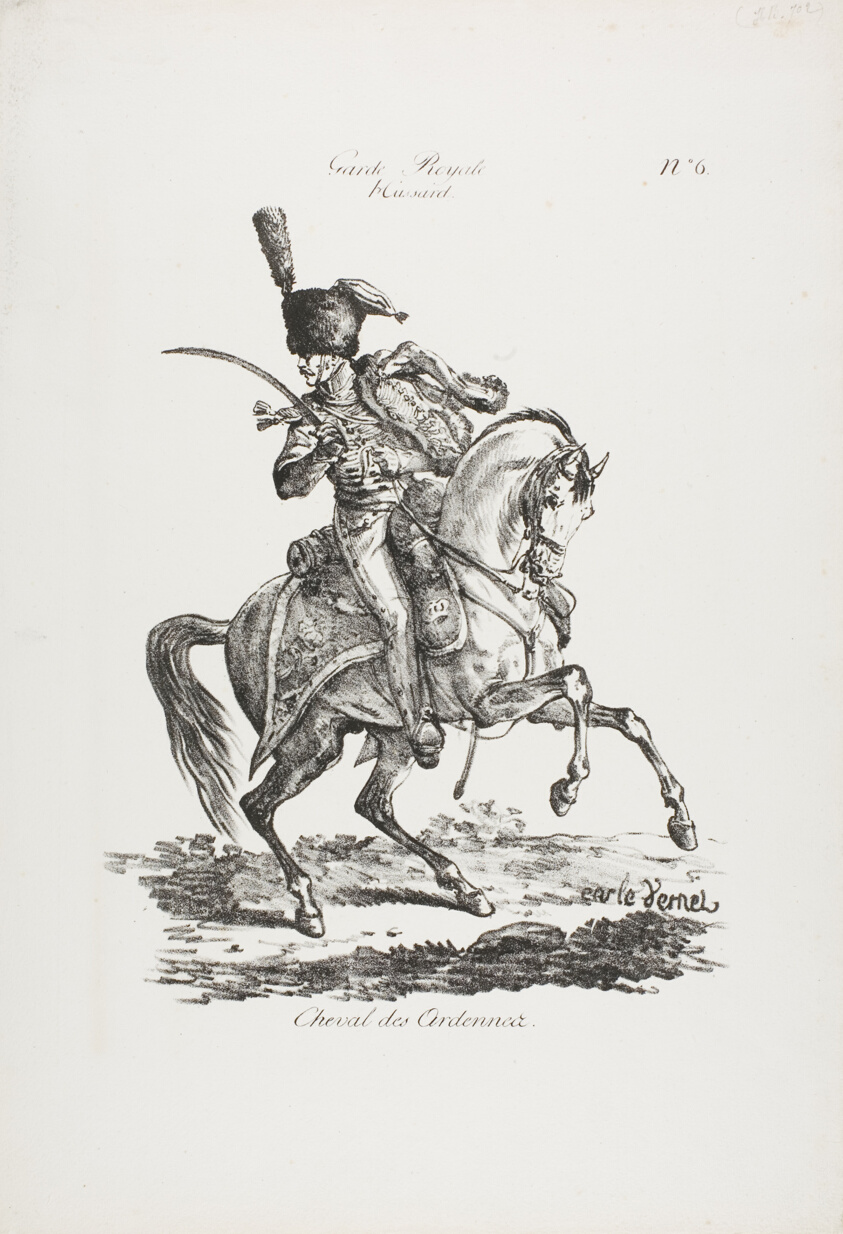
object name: Print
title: Royal Guard, Mounted Hussard and Horse No. 6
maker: Carle Vernet (French, 1758-1836); printed by Comte Charles Philibert de Lasteyrie (French, 1759-1849)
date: c. 1818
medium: Lithograph in black on ivory wove paper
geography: France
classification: lithograph; print; prints and drawing